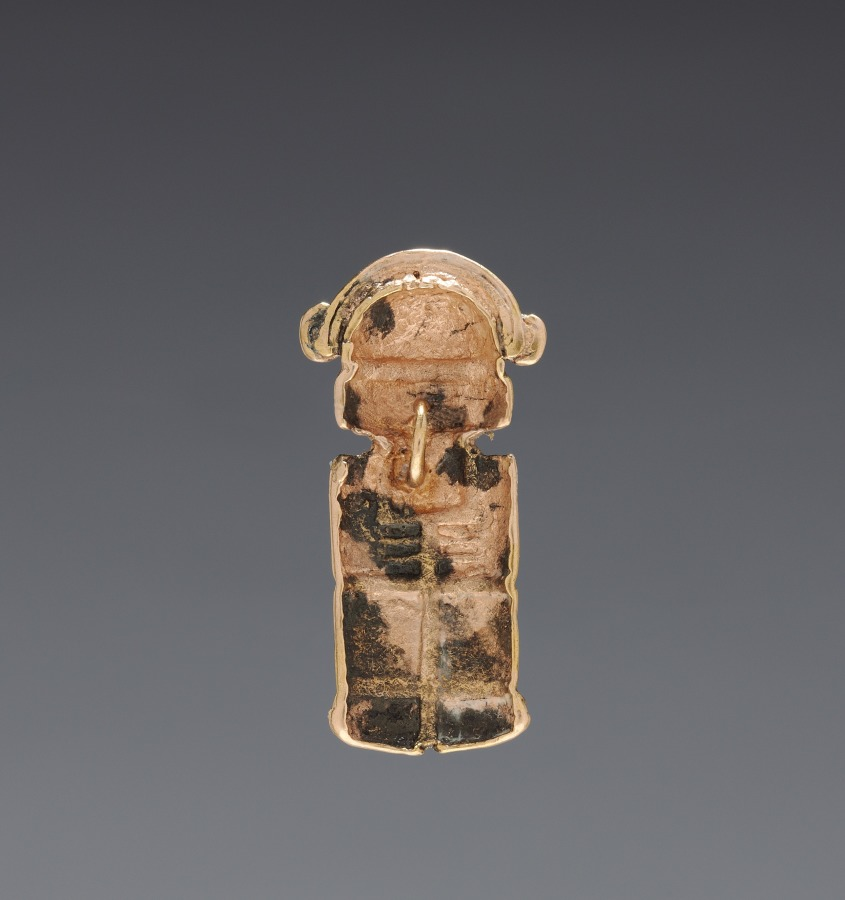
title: Necklace Figurine Bead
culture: Colombia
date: 1–700 CE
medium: cast gold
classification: Jewelry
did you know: Working with gold dates back to at least 500 BC in Ecuador and Colombia.